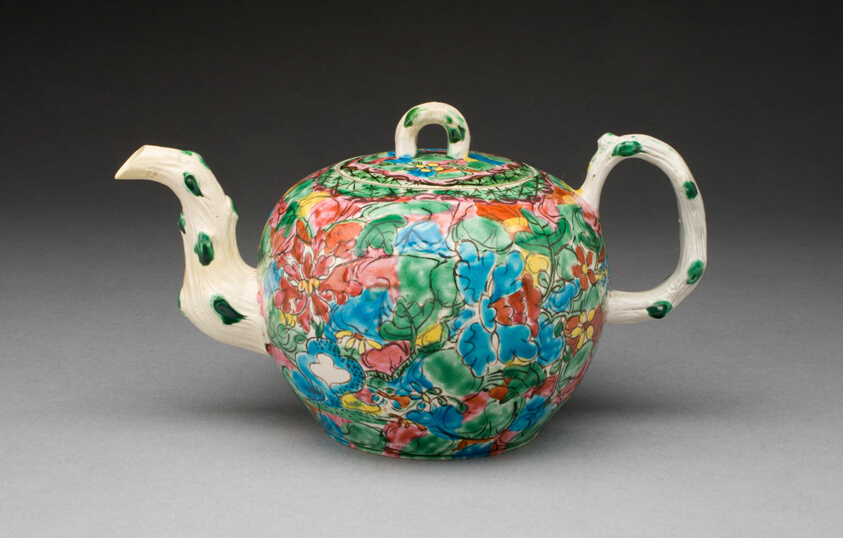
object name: Ceramics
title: Teapot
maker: England, Staffordshire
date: c. 1760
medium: Salt-glazed stoneware, polychrome enamels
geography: Staffordshire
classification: teapot; stoneware; european decorative arts; salt-glazed stoneware; ceramics